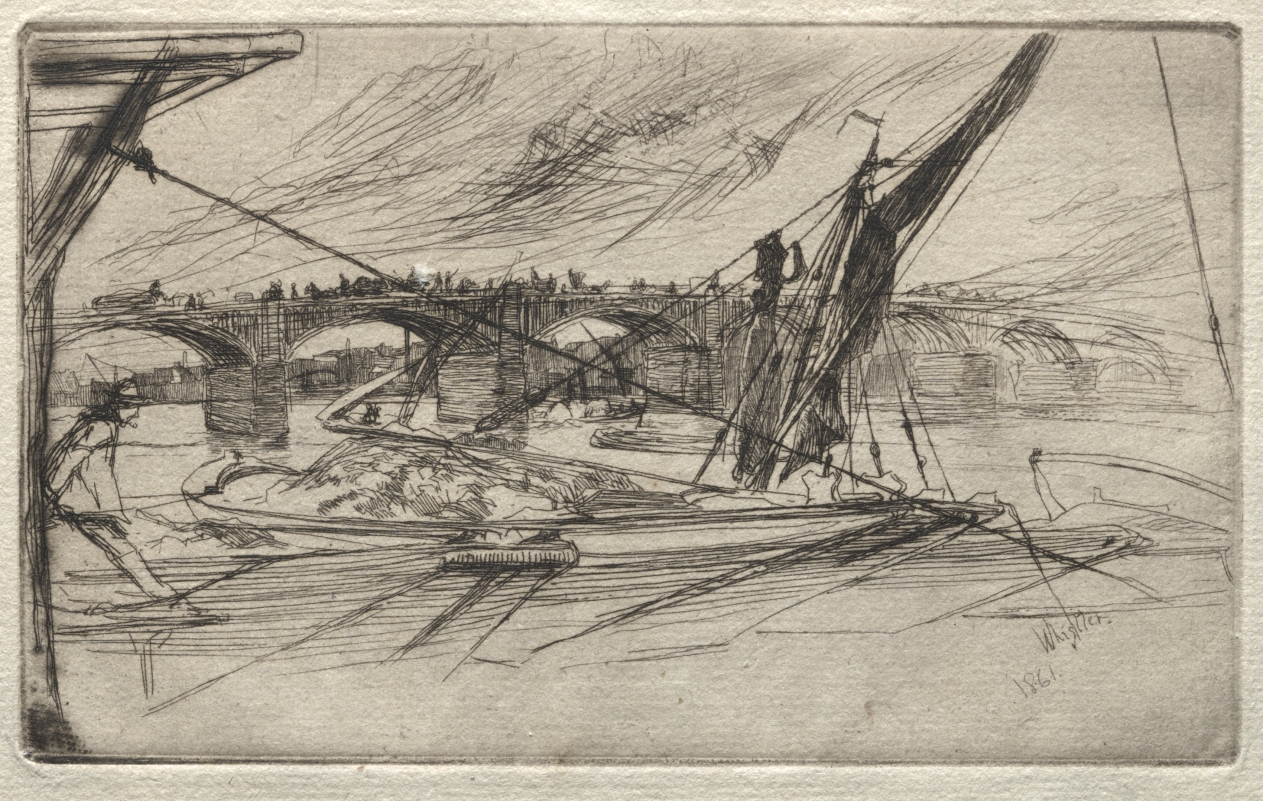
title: Vauxhall Bridge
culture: America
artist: James McNeill Whistler (American, 1834–1903)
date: 1861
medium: etching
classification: Print